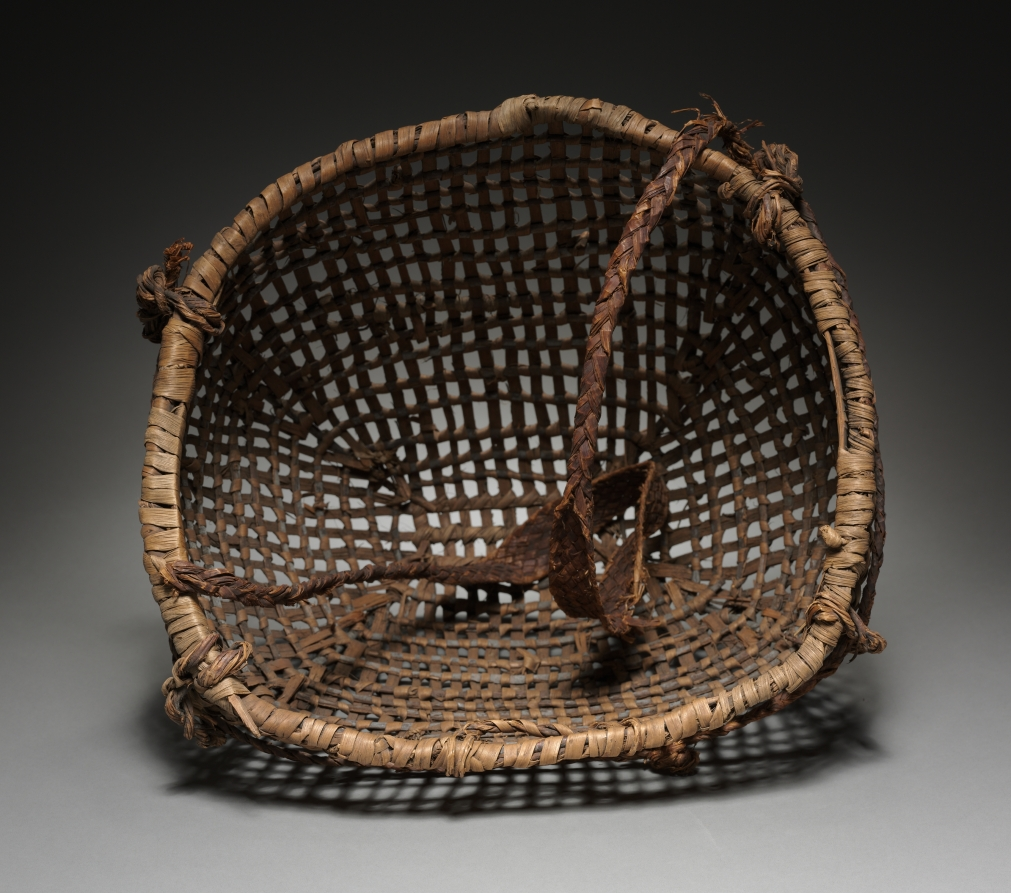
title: Clam basket with Tump Line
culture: Northwest Coast, Klallam, late 19th century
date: late 1800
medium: Cedar root; openwork, braided, plaited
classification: Basketry